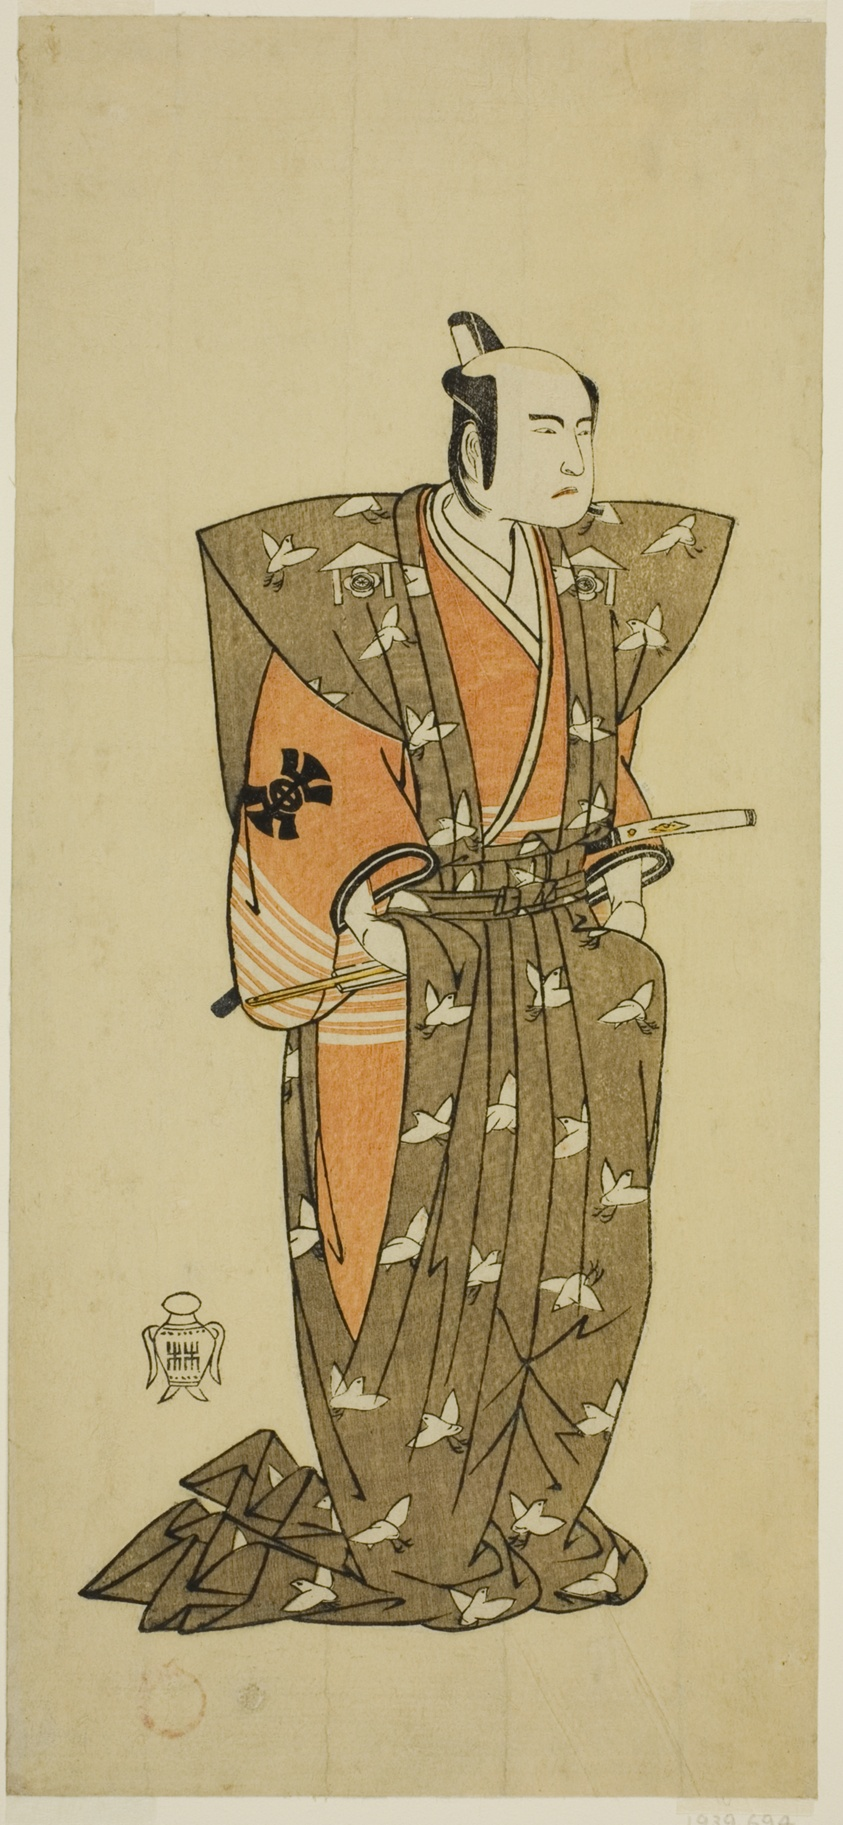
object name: Print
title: The Actor Bando Mitsugoro I as Soga no Juro Sukenari (?) in the Play Shuen Soga Omugaeshi (?), Performed at the Ichimura Theater (?) in the Second Month, 1768 (?)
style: Japanese (culture or style)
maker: Katsukawa Shunsho 勝川 春章; Japanese, 1726-1792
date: c. 1768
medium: Color woodblock print; hosoban; probably one sheet of a five-sheet print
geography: Japan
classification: woodblock print; print; asian art